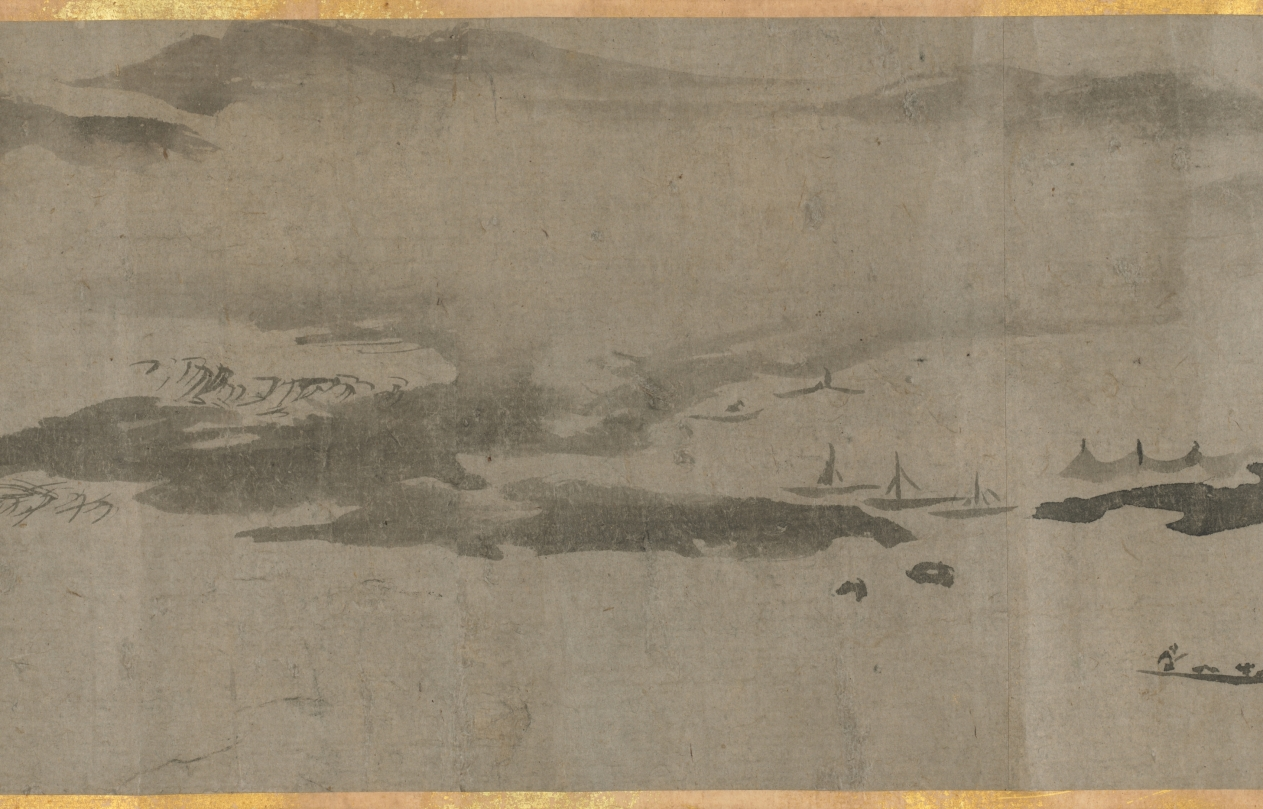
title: Eight Views of Xiao-Xiang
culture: Japan, Muromachi period (1392–1573)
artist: Sesson Shūkei (Japanese, c. 1492–c. 1577)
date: 1500s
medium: handscroll; ink on paper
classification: Painting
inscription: Signature and seal of artist at end of painting.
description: Eight Views of the Xiao and Xiang Rivers can be traced to 11th-century Chinese poems and paintings, the depiction of which had also become popular among Korean and Japanese painters. Xiao-Xiang refers to the region in present-day Hunan province where the Xiao and Xiang rivers converge. Few painters of the Eight Views had in fact seen the scenery; rather, they were trying to portray in ink and wash the lyrical qualities of dim light and a misty atmosphere typical of that region. Each of the poetic titles suggests a time of day, a season, or specific atmospheric conditions—subjects that challenged the abilities of the most talented artists. In this miniature painting (shukuzu) of the Muromachi period, Japanese Zen monk and painter Shukei Sesson depicted all eight views featured in Chinese prototypes: Wild Geese Descending to Sandbar; Returning Sails Off a Distant Coast; Mountain Market in Clearing Mist; River and Sky in Evening Snow; Autumn Moon over Dongting Lake; Night Rain on the Xiao and Xiang; Evening Bell from Mist-Shrouded Temple; and Fishing Village in Evening Glow.